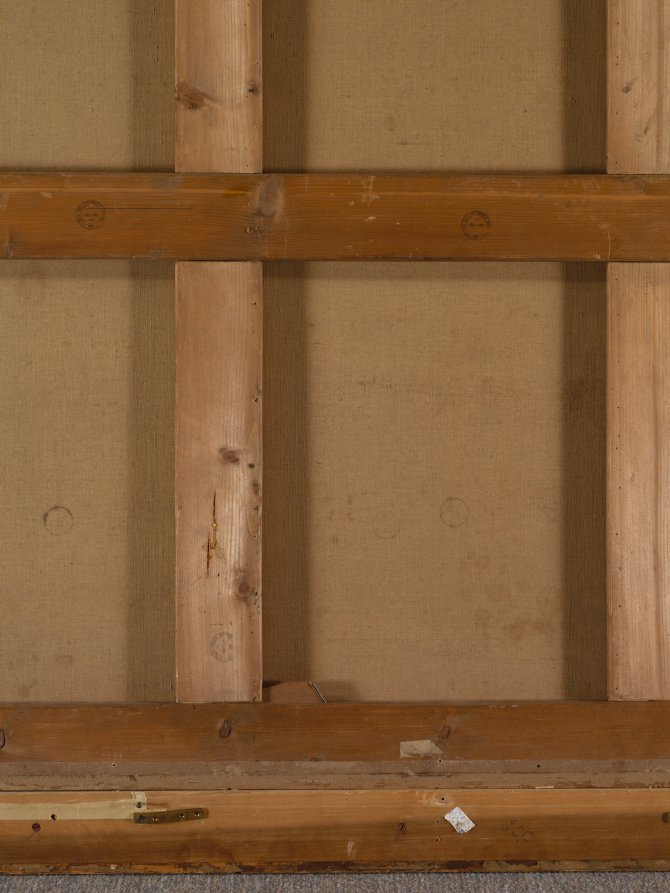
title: Interior of a Synagogue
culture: Italy, 18th century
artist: Alessandro Magnasco (Italian, 1667–1749)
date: c. 1725–35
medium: oil on canvas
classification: Painting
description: The Jewish synagogue was among Magnasco's most frequently painted subjects, here presented in a mystical and imaginative way. Expansive architectural space creates room for a multitude of tiny, fantastical figures with elongated limbs. These characters respond to the service with emotion and expressive gestures. Flashes of light dash across the surface against a dark, muted palette of earthy tones suggesting an otherworldly presence. The composition invites the viewer to enter the space and experience the service. Though he used characteristic elements of Baroque composition and was strongly influenced by Venetian painting, Magnasco's loose brushwork, elongated figures, and mysterious subject matter set him apart. Magnasco peers into a world of which he was not part: he was not Jewish and probably perceived Jews as outsiders. At the dawn of the Enlightenment in Europe progressive aristocratic families commissioned paintings by Magnasco, suggesting the painter's support for Enlightenment ideals which included religious tolerance, but Magnasco's personal views on Judaism in Italy remain unknown.